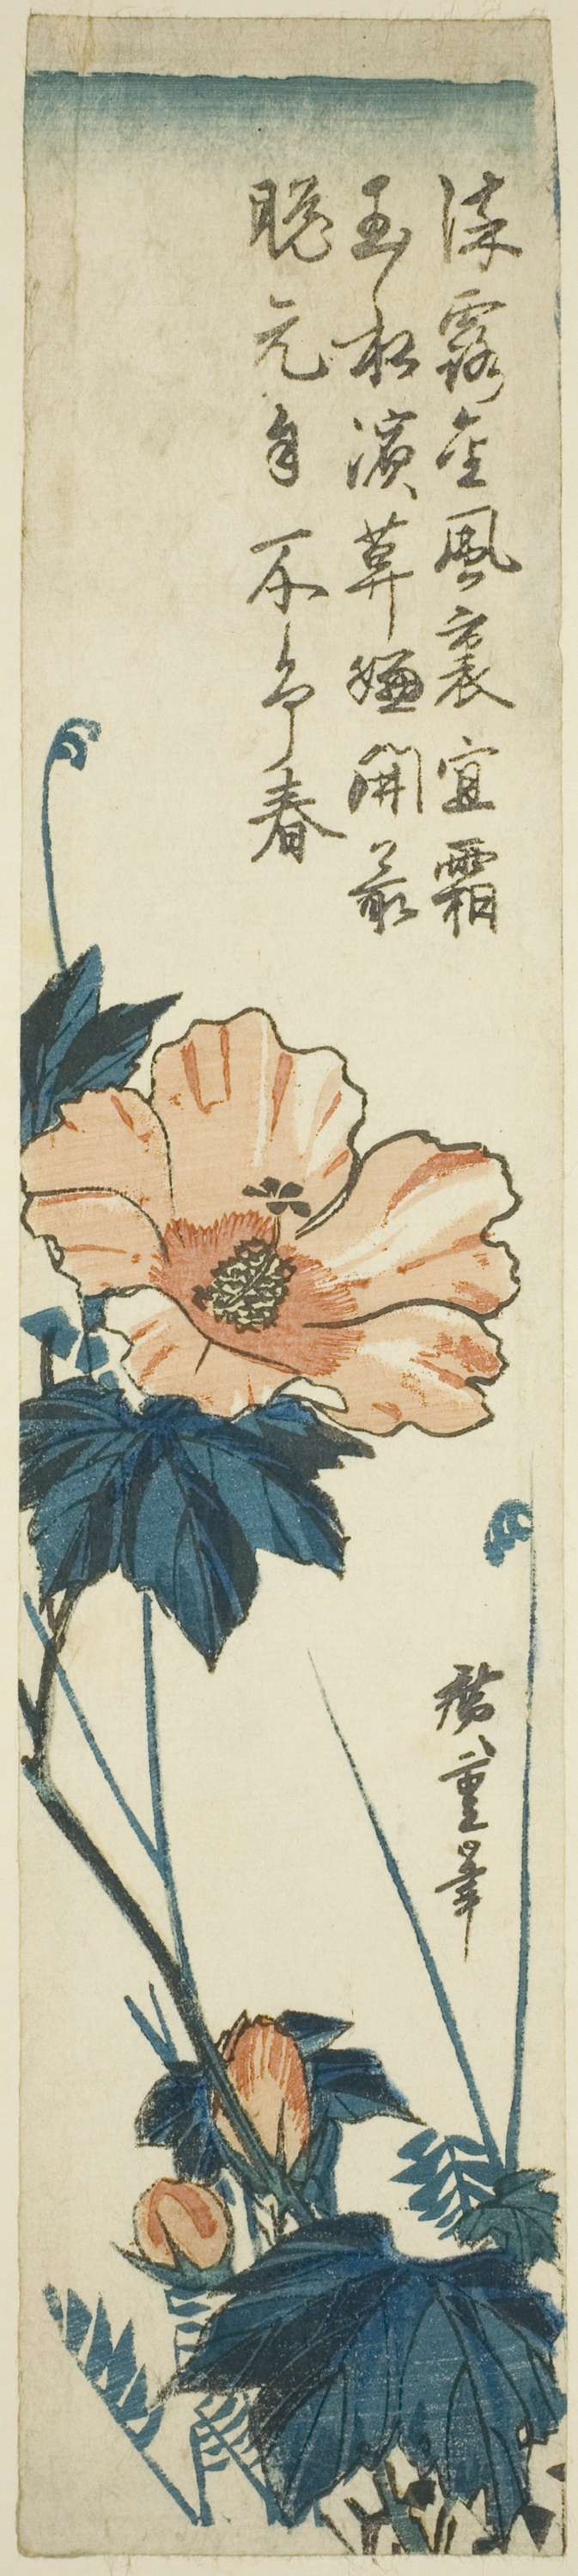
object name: Print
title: Hibiscus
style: Japanese (culture or style)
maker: Utagawa Hiroshige 歌川 広重; Japanese, 1797-1858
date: 1830s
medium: Color woodblock print; kotanzaku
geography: Japan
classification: woodblock print; print; asian art